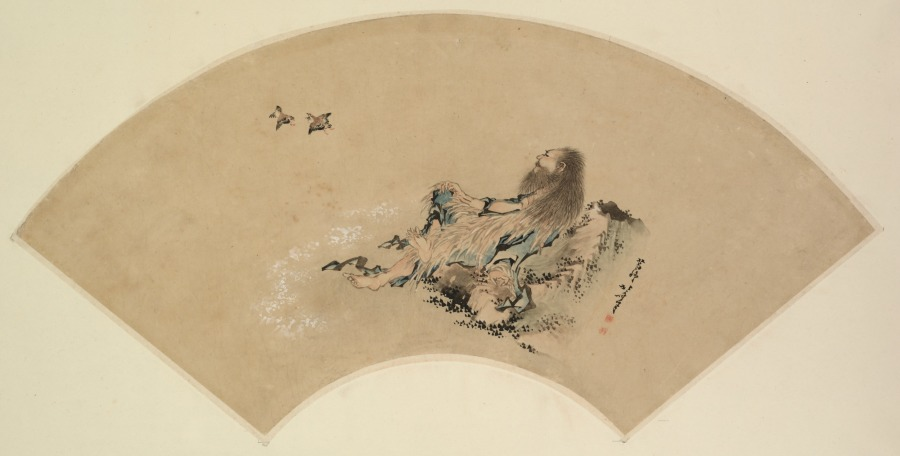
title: Risshi by the Sea Watching Birds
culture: Japan, Edo period (1615–1868)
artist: Katsushika Hokusai (Japanese, 1760–1849)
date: late 1700s–1849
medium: fan painting; color on paper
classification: Painting